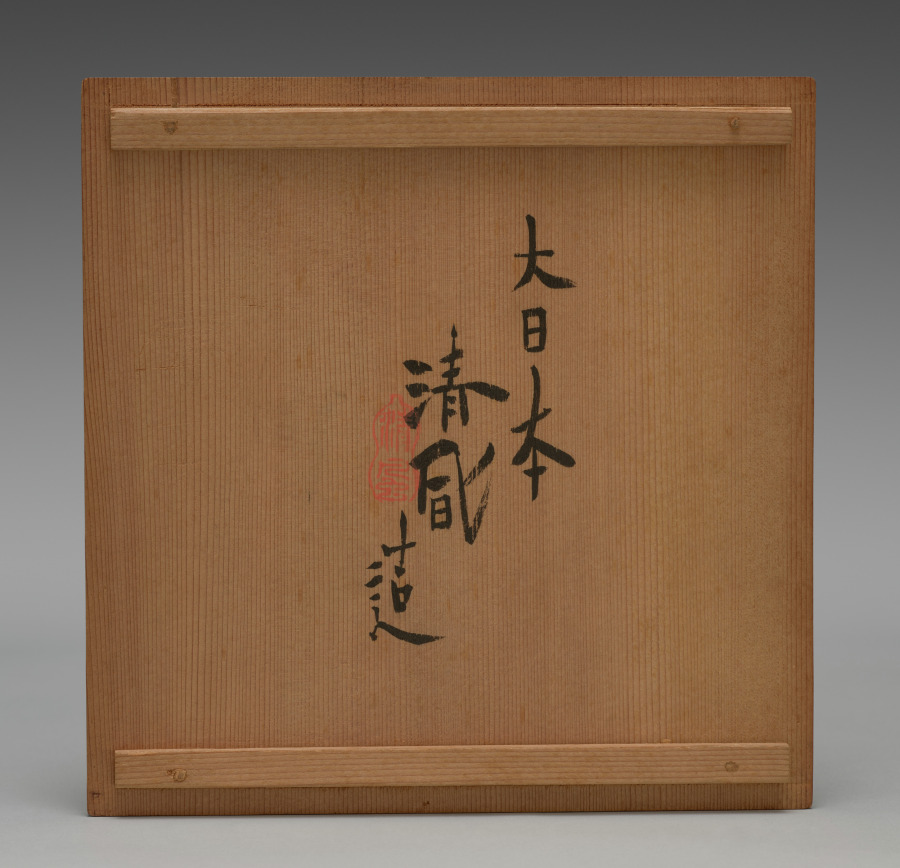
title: Flower Vase with Phoenix in Paulownia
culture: Japan, Meiji period (1868–1912)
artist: Seifū Yohei III (Japanese, 1851–1914)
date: 1897–1914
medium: Porcelain with molded and carved design and underglaze color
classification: Ceramic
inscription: 清風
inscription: 清風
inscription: 清風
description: The phoenix’s commanding presence on this vase was created by adding clay to the surface of the white clay body and then intricately molding and carving it. Then cobalt blue was used to paint the paulownia tree upon which the phoenix perches. Yohei III used a masking technique, covering the phoenix with paper before adding pink color to the area surrounding it. Firing with an allover transparent glaze created a glossy surface, with the phoenix standing out boldly from the background. The mythical bird’s long tail sweeps majestically around the vessel so that one must move around it to see the eyespots in its plumes. A symbol of imperial power in both China and Japan, the phoenix is said to alight only in the paulownia tree. Upon close inspection of its face, one can see that the phoenix’s eye is in yellow under the glaze. The scene is set off at the bottom with a double band of underglaze blue above an incised ring of cloud. Once Yohei III had created his creamy translucent taihakuji glaze, he began applying it over the entire surface of an ivory clay body with motifs in low relief to achieve a creamy white-on-white design. He then began using the combination of gradated pink around raised motifs on a typical white porcelain clay body like the one for this vase. He masked his low-relief designs with paper before sprinkling diluted iron oxide glaze onto the surrounding areas through a net with a brush. These unpigmented elements stand out as starkly white against the gentle pink blush color that surrounds them. Still later, he added pink to the translucent creamy glaze he used in kanpakuji works and used it over motifs in relief on an ivory clay body for an overall pink-tinged cream effect (see CMA 2022.198).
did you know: In 1893, Seifū Yohei III became the first ceramist to be appointed as an Imperial Household Artist under a system introduced by the Japanese government in 1890.